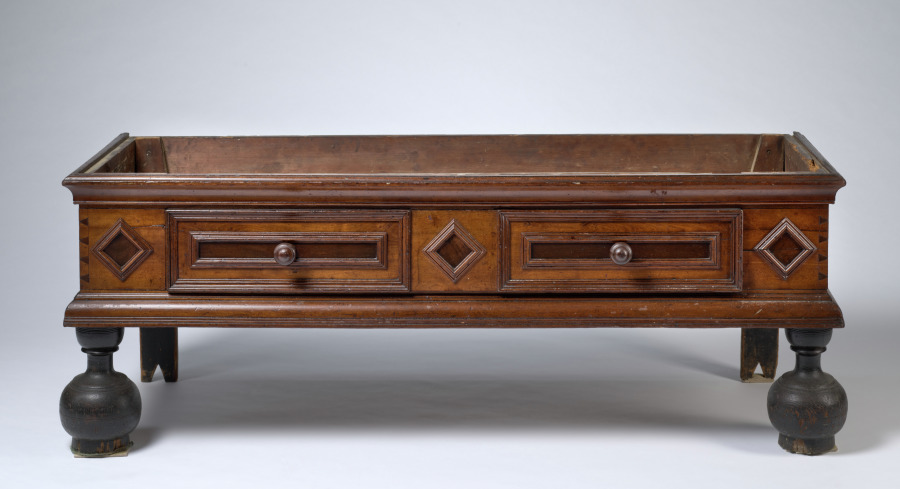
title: Kast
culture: American, King County, NY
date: c. 1710–1740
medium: Various woods, wrought iron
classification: Furniture and woodwork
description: The earliest furniture made in America often shared similarities with works made in the country from where the settlers originated. With its bun feet, paneled surface, and broad projecting cornice, this wardrobe (kast) resembles earlier Dutch examples that come from Amsterdam and its surrounding areas. Therefore, this wardrobe was likely made by the Dutch settlers who colonized New York and New Jersey.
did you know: This Dutch American wardrobe was likely made in a community along the Hudson River in New York by a cabinetmaker who had originally come from the region in or around Amsterdam in Holland.